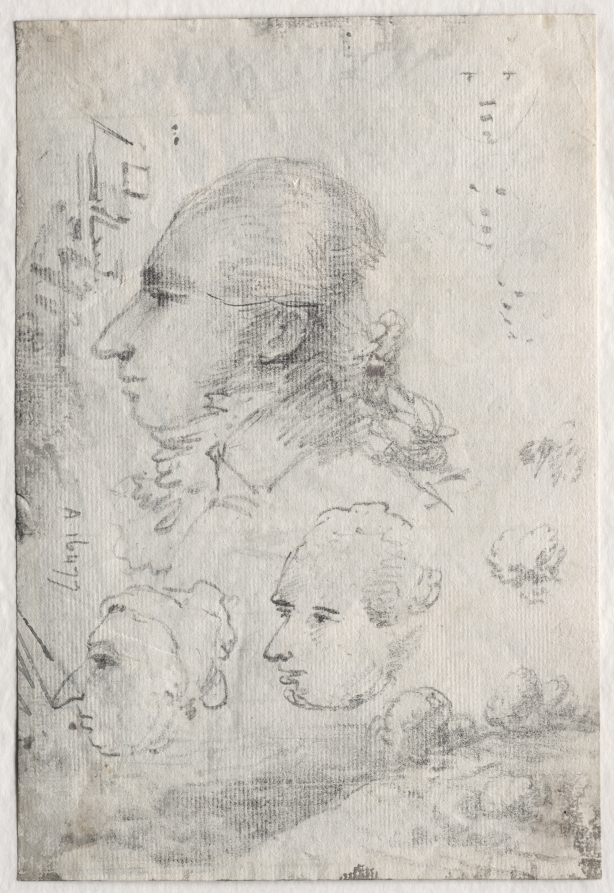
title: Studies of Heads (verso)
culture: England, 18th century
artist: Thomas Monro (British, 1759–1833)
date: c. 1820s(?)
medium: black chalk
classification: Drawing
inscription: verso, in graphite: A 16477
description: Dr. Thomas Monro is best known as a patron who exercised significant influence in the London art world in the late 18th and early 19th centuries, but he was also an amateur artist and competent follower of Thomas Gainsborough. The physician’s drawings were monochromatic, done in wash with additions of charcoal, chalk, or india ink in emulation of Gainsborough’s moody rural views. On the verso of the drawing is a mise-en-page of caricatures and a hillside—perhaps whimsically drawn by multiple artists at one of the doctor’s salons.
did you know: Dr. Thomas Monro established what became known as an "Academy," where artists gathered in the evenings to draw, at his home overlooking the Thames.